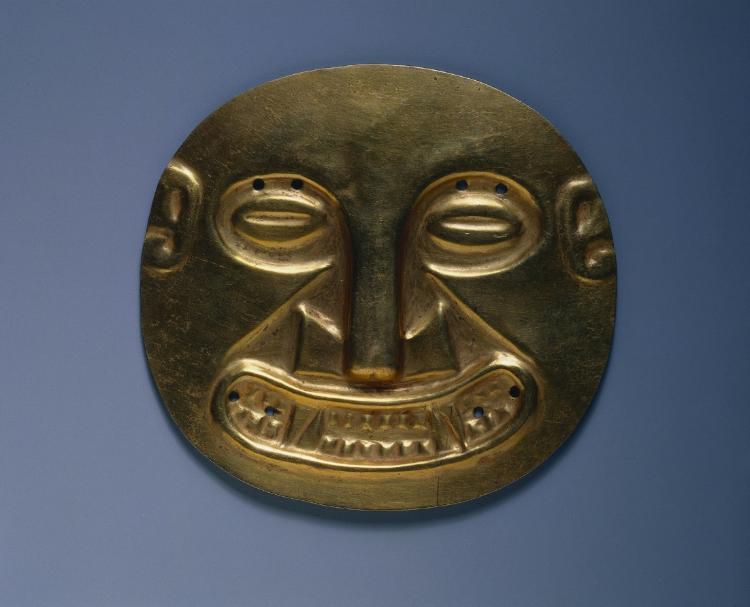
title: Ornament from Sitio Conte: Small Plaque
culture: Panama, Conte style, 5th - 10th century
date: c. 400–500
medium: hammered gold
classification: Metalwork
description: Harvard archaeologists excavated this ornament from Grave 32 at Sitio Conte, a cemetery famous for its lavish graves of powerful chieftains. The warm gleam of gold linked rulers with the sun’s creative force.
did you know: This disk was excavated from a burial containing three bodies.